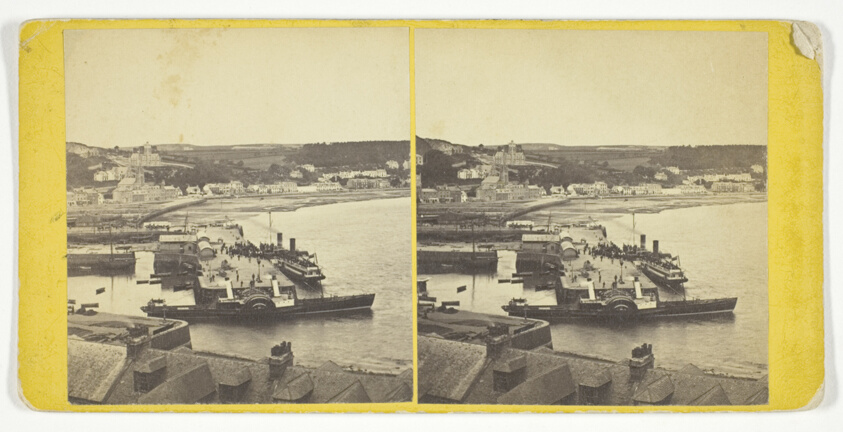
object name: Photograph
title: Rothesay Pier - Island of Bute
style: 19th century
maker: G. W. Wilson (Scottish, 1823–1893)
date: Mid 19th century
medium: Albumen print, stereo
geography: Scotland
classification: photography; photograph